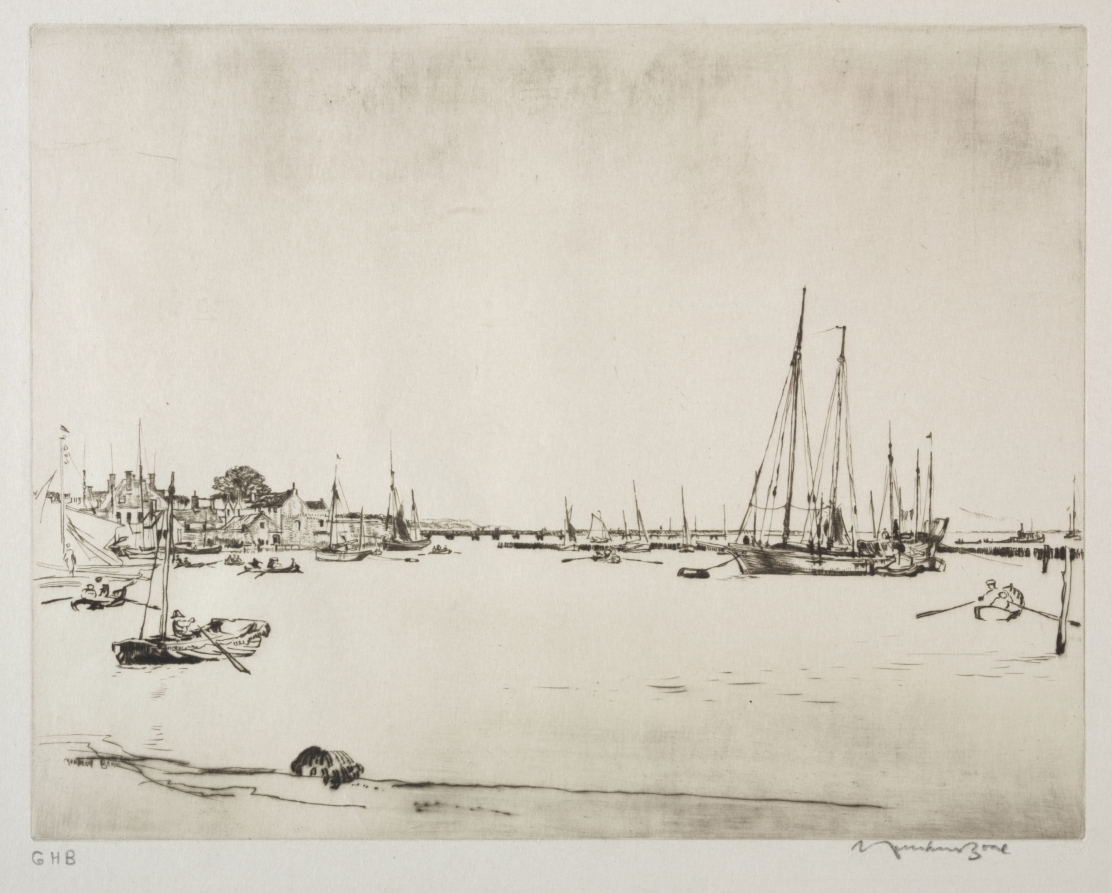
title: Yarmouth, Isle of Wight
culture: England, 20th century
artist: Muirhead Bone (British, 1876–1953)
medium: drypoint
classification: Print